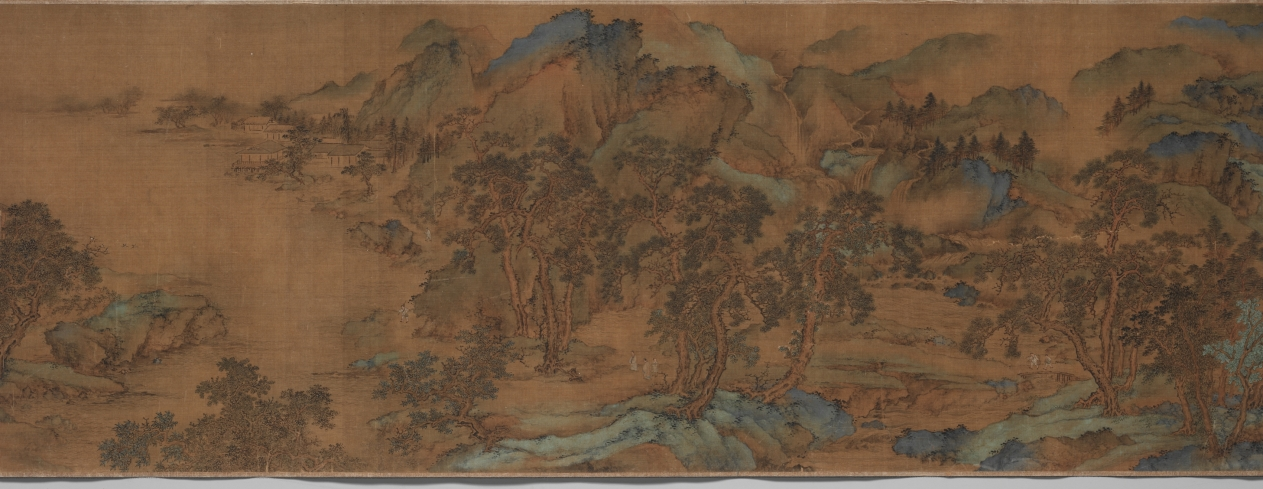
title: Landscape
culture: China, Ming dynasty (1368–1644)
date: 1368– 1644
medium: handscroll; ink and slight color on silk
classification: Painting